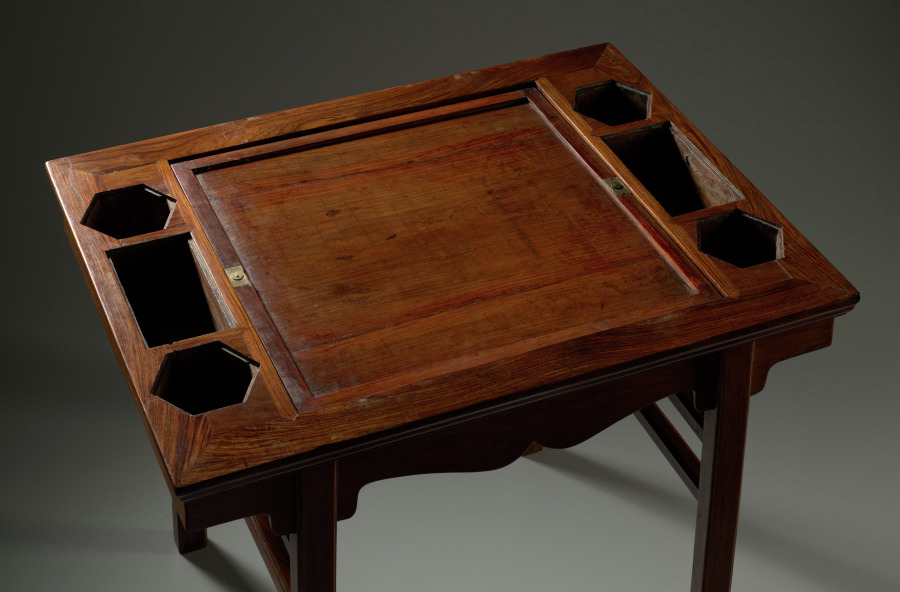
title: Game Table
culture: China, Ming dynasty (1368-1644) - Qing dynasty (1644-1911)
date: 1600s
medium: Rosewood (huanghuali)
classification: Furniture and woodwork